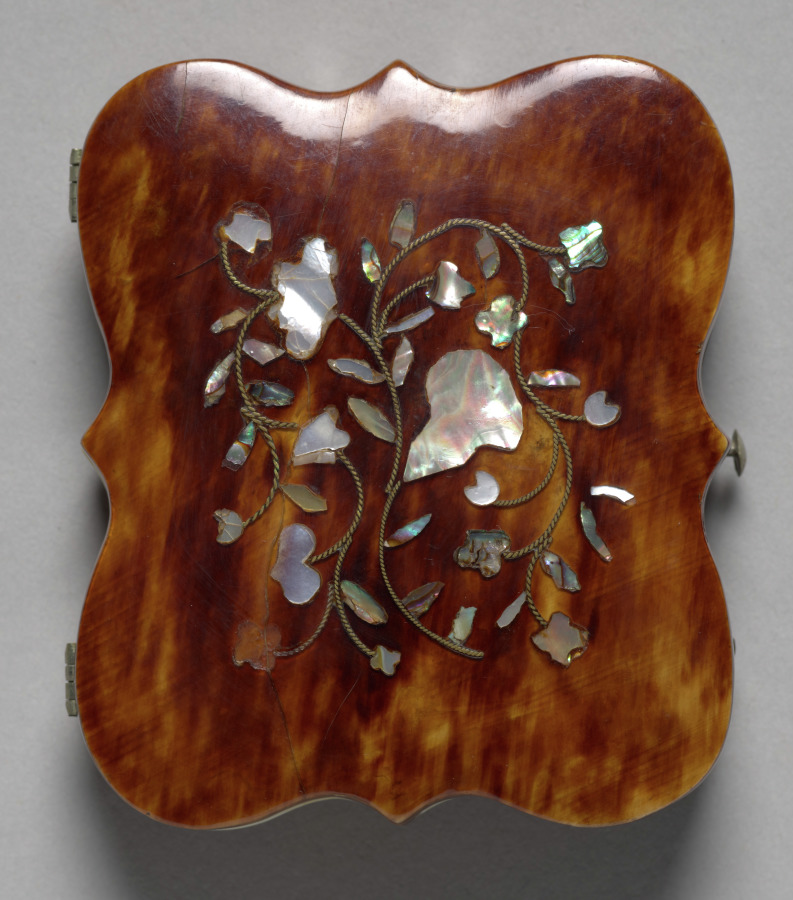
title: Woman with elaborate nautical backdrop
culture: America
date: c. 1860–65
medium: ambrotype, tinted, ninth plate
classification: Photograph